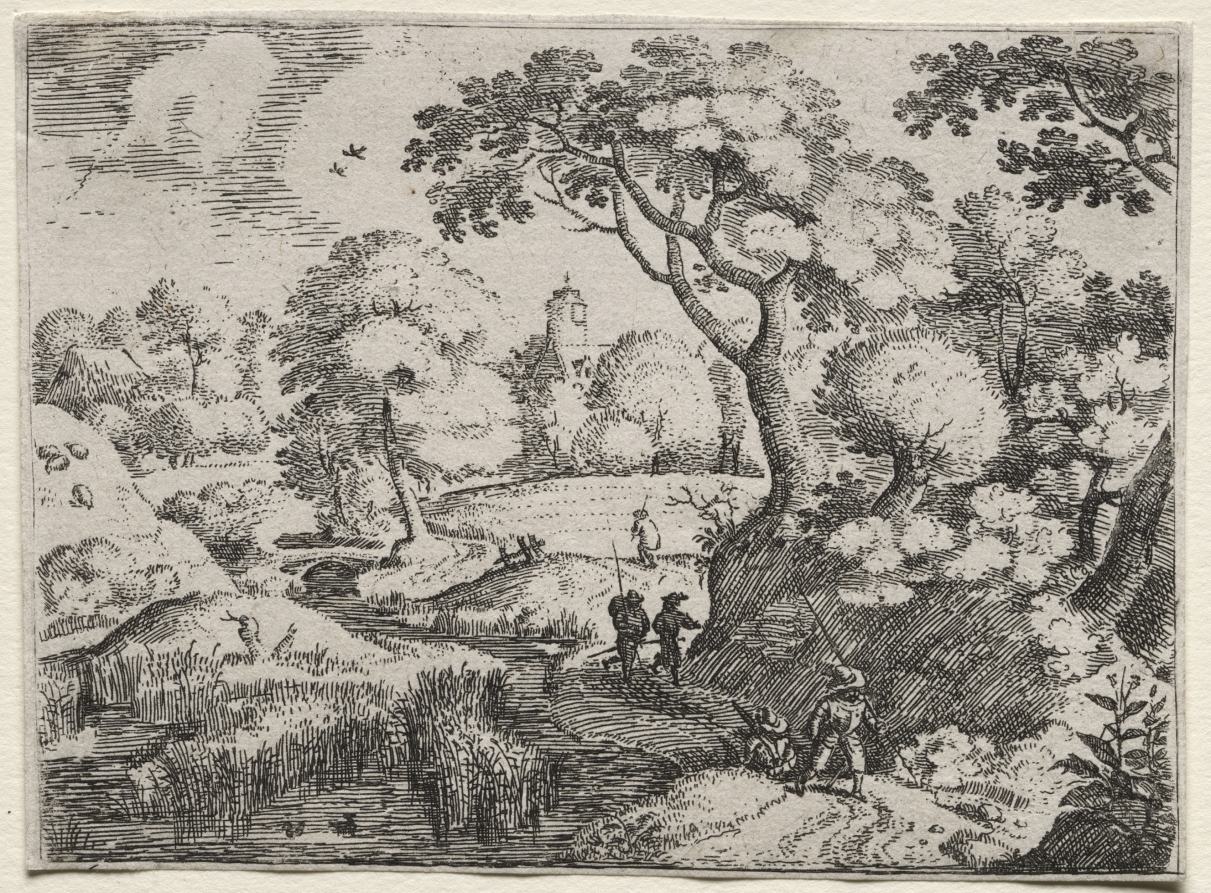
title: Six Landscapes: Path Between Swamp and Wooded Bank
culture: Netherlands, 16th century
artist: Jacob Savery I (Dutch, 1566–1603)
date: c. 1595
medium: etching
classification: Print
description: One of a series of six wooded landscapes, this print characterizes some of the most significant developments in 17th-century Dutch landscape and provides a striking contrast to the dramatic forest interiors of other Flemish immigrant artists. As etching superseded engraving in landscape prints, original compositions designed by printmakers replaced reproductions of works by contemporary painters. Savery's etching also anticipates the rise of Dutch realism, with more accurate representations of the native landscape. The broken contours of the trees describe a sun-drenched afternoon as soldiers, identified by their distinctive hats and armored chest plates, journey along a path through the rolling countryside.